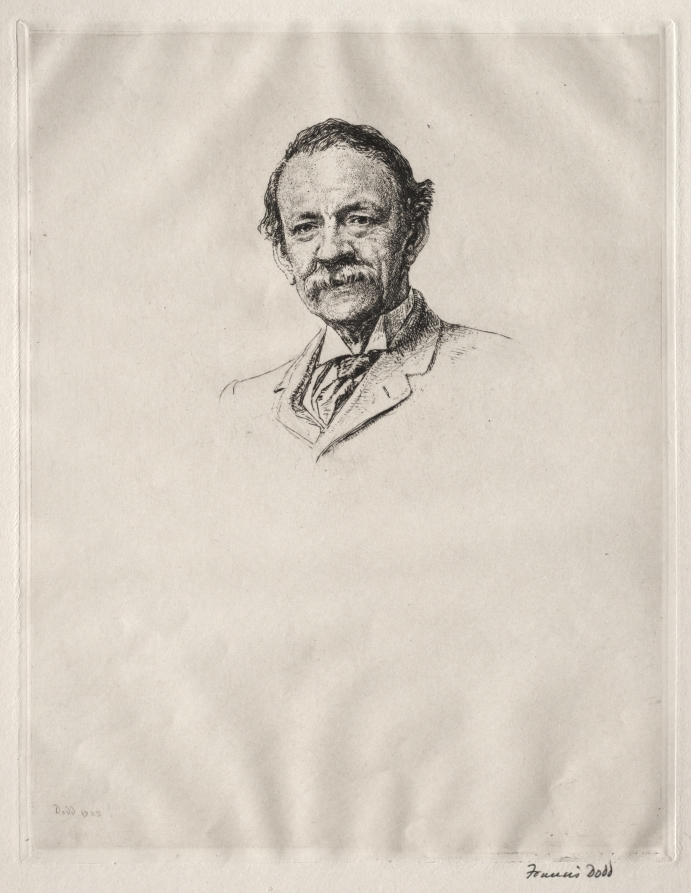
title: Sir Joseph John Thomson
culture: England, 20th century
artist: Francis Dodd (British, 1874–1949)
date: 1925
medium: etching and drypoint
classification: Print